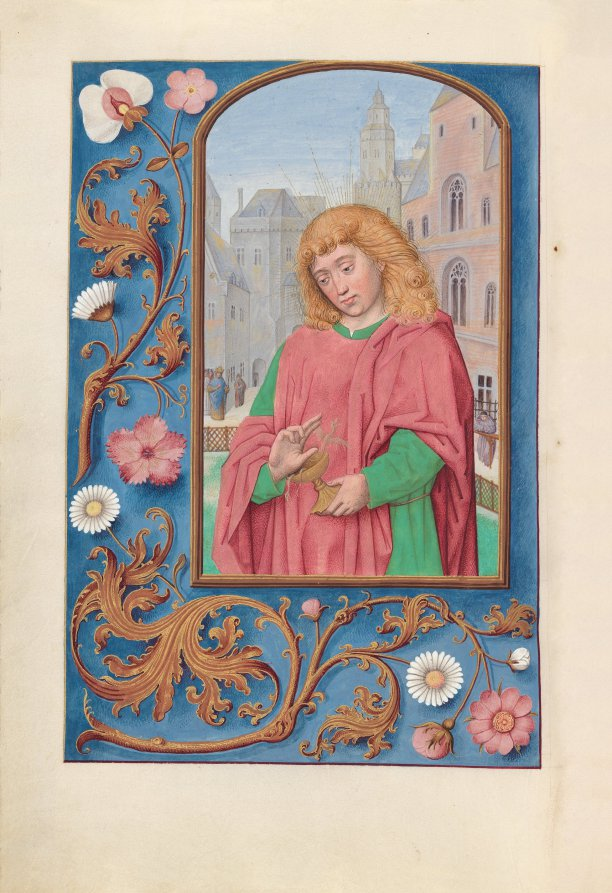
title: Hours of Queen Isabella the Catholic, Queen of Spain: Fol. 171, St. John the Evangelist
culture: Flanders, Ghent and Bruges, late 15th century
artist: Master of the First Prayerbook of Maximillian (Flemish, c. 1444–1519)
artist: and Associates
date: c. 1500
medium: ink, tempera, and gold on vellum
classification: Bound Volume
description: This manuscript was illuminated by a circle of at least five highly organized manuscript painters active in the Flemish cities of Ghent and Bruges. The principal illuminator was Alexander Bening, who painted the majority of the book's miniatures. Manuscripts produced by this circle of artists are renowned for the decoration of their borders, which typically feature a rich variety of realistically-painted flowers, birds, and butterflies. This prayer book, called a book of hours, was intended not for a cleric, but for the private devotions of a lay person-in this case, Isabella the Catholic, Queen of Spain (1451-1504). Isabella's coat of arms embellishes the book's frontispiece. It is unlikely that the book was commissioned by the Queen herself; rather, she probably received it as a diplomatic gift from someone courting her patronage, perhaps Cardinal Francisco Jimenez de Cisneros. A Franciscan friar, Jimenez was dependent upon Isabella for his advancement, first to the post of Queen's confessor in 1492, and then to Archbishop of Toledo in 1495.